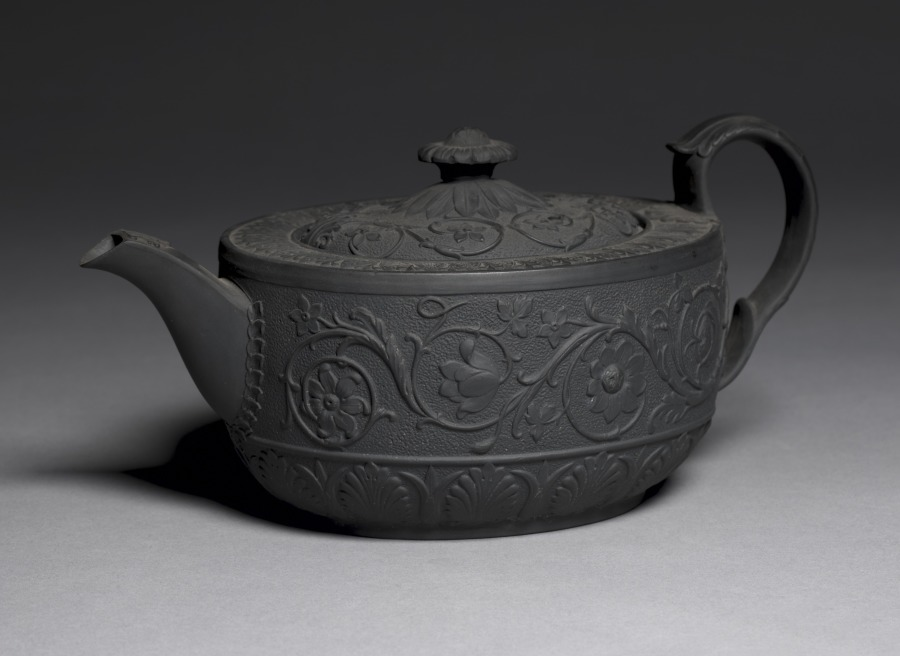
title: Teapot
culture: England, 19th century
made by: Elijah Mayer & Son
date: c. 1810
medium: black basalt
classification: Ceramic